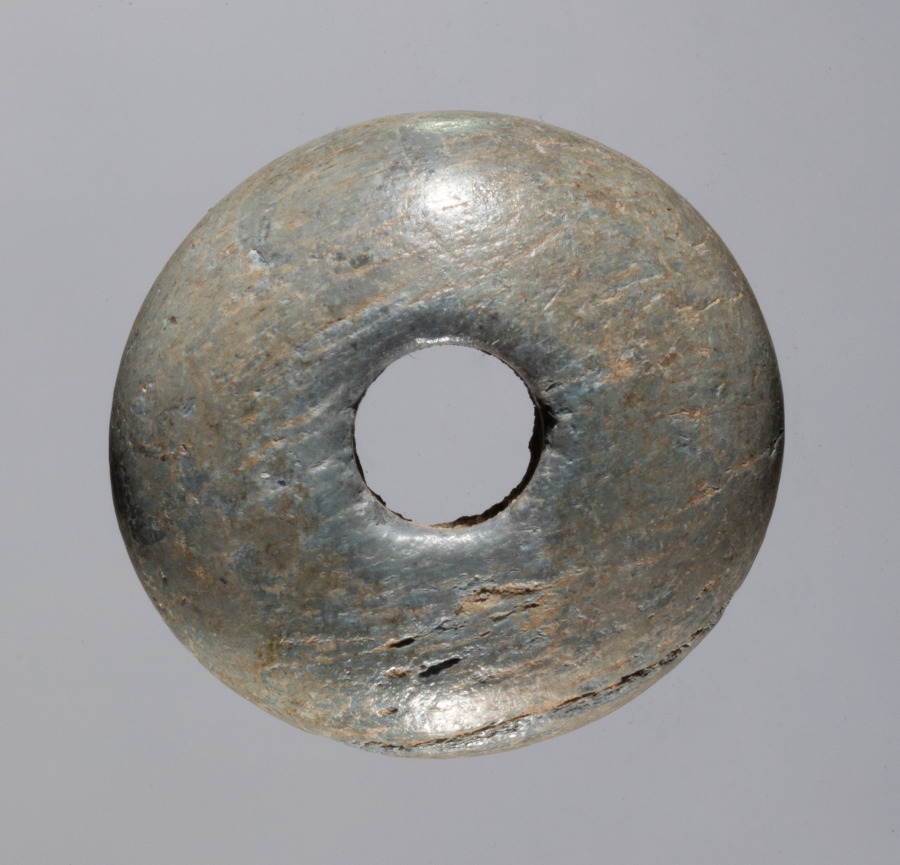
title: Spindle Whorl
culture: Iran, early Islamic period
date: 700s - 900s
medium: bone, incised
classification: Spindle Whorl